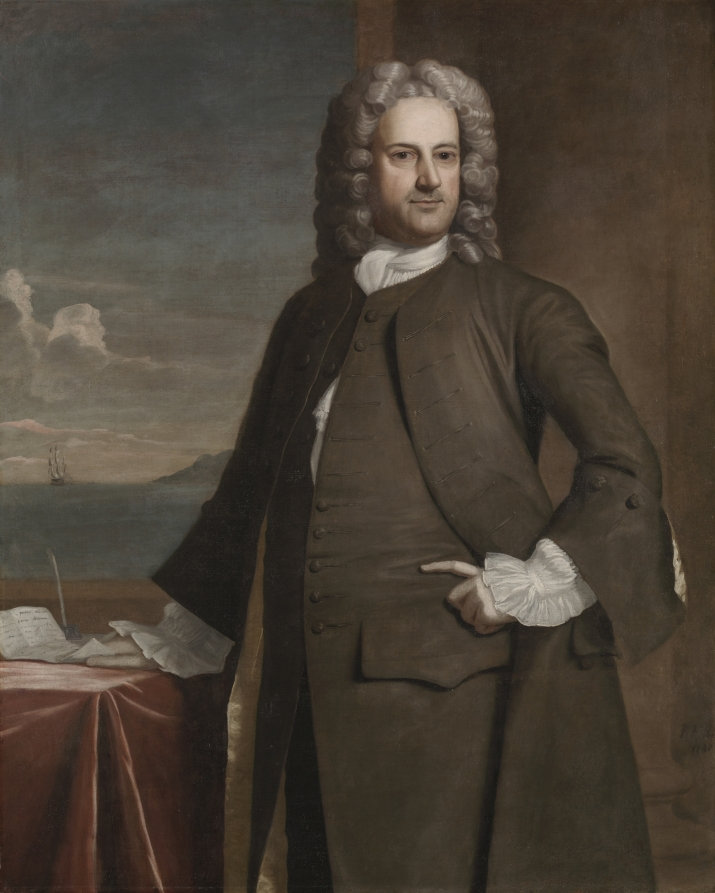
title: Charles Apthorp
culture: America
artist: Robert Feke (American, c. 1707–c. 1752)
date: 1748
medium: oil on canvas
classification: Painting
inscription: Signed lower right: R F P/174[8]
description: Called “the greatest merchant on this Continent” in his obituary, Apthorp helped transform Boston into one of the key commercial centers in the American colonies. When the fashionable painter Robert Feke came to town, Apthorp commissioned this elegantly tailored and confidently posed likeness of himself. The sailing ship in the distant background symbolizes Apthorp’s deep financial interests in the Atlantic trade, which included not only textiles, wine, and guns, but also enslaved people. In fact, the slave trade and its attendant commerce comprised a significant portion of colonial Boston’s economy until the decades after the Revolutionary War, when anti-slavery attitudes in New England gained momentum.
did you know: Much remains unknown regarding artist Robert Feke’s life, including his birth and death dates.